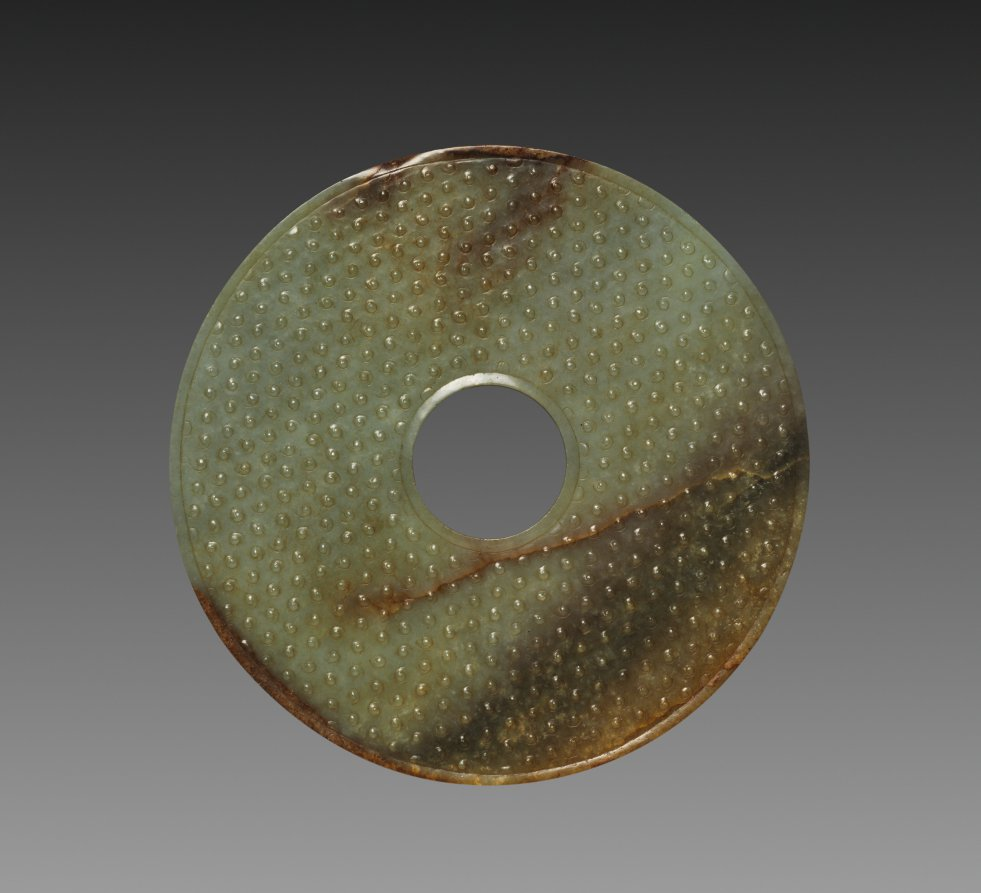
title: Ceremonial Disk with Grain Pattern (Bi)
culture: China, Warring States period (475–221 BCE)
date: 475–221 BCE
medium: jade (nephrite)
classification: Jade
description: Jade disks of later centuries developed from the Neolithic period’s plain design to incorporate dense surface decoration. This example bears raised dots with finely incised spirals--so-called grain patterns--arranged in diagonal rows.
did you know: The disk's outer rim is incised with a 47-character poem written in seal script, dated to the gengyin year of the Qianlong emperor's reign [1770].